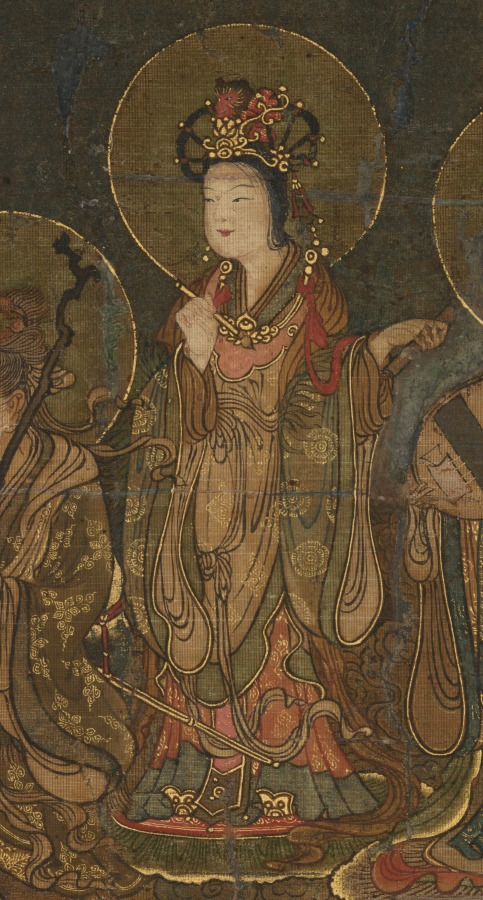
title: Descent of the Nine Luminaries and the Seven Stars at Kasuga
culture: Japan, Nanbokuchō period (1336–92)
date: mid- to late 1300s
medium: Hanging scroll; ink, color, gold and cut gold on silk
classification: Painting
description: This medieval religious painting shows celestial beings descending from the heavens into the Kasuga Shrine, a major religious site in Japan's ancient capital, Nara. The moon and the Kasuga mountain range appear in the uppermost portion of the painting, as does a red shrine entrance gate, or torii. In the upper part of the painting, figural representations of the stars in the constellation known as the Big Dipper in the West descend from right to left on cloud banks. In the lower part, the Nine Luminaries (Sanskrit: Navagraha) that emerged from the Vedic tradition—the sun and moon; the planets Jupiter, Mars, Saturn, Venus, and Mercury; and personifications of the fluctuating lunar nodes—descend in similar fashion. The painting uses the "deities in descent" scheme originating in China, as well as the original Buddhist form mandala (Japanese: honjibutsu mandarazu) format prevalent in medieval Japanese Shinto-Buddhist painting, to generate an image connected to the worship of celestial bodies in Esoteric Buddhism.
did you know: A 19th-century copy of this painting in ink and light color exists at the Kyoto City University of Arts.